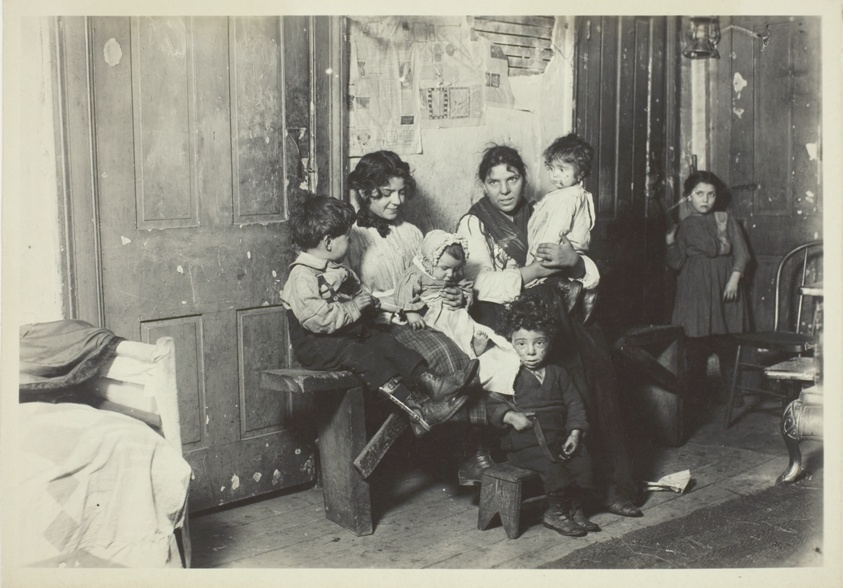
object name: Photograph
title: Italian Family, Chicago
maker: Lewis Wickes Hine (American, 1874–1940)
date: 1910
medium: Gelatin silver print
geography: United States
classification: gelatin silver (developing-out-paper) pr; photographic process; photography; photograph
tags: Collected by Hugh Edwards, documentary